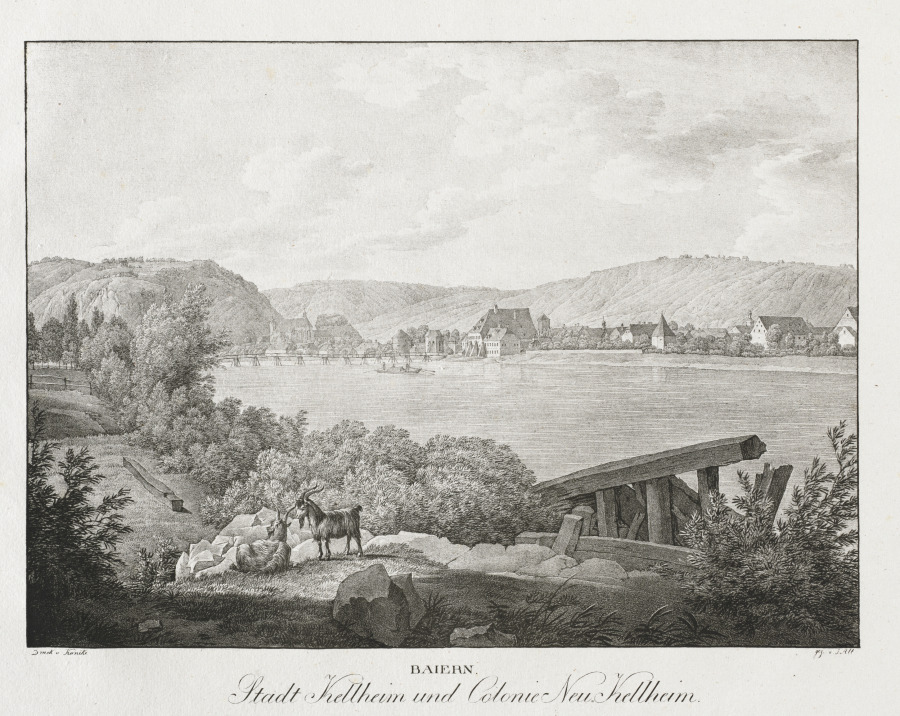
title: Baiern, Stadt Kellheim und Colonie Neu-Kellheim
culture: Austria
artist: Jakob Alt (Austrian, 1789–1872)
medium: lithograph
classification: Print